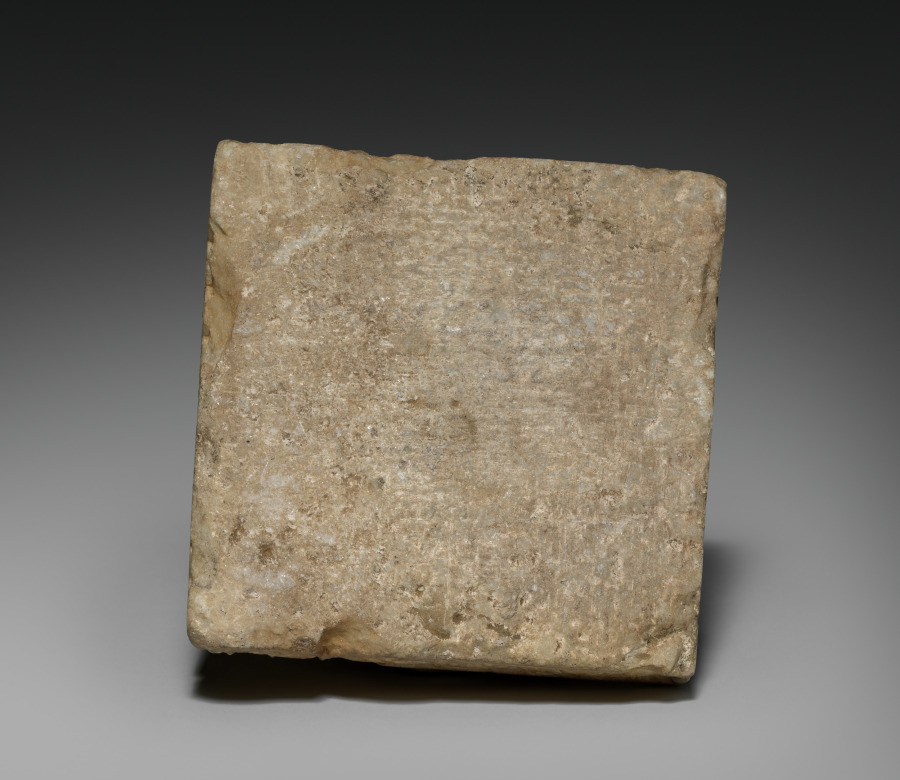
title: Column Base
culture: Spain, Cordoba, Spanish Umayyad period (756–1031)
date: c. 960–76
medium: Marble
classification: Sculpture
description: This base comes from the palatial city of Madinat al-Zahra near Cordoba (Spain) which was begun by caliph Abd al-Rahman III (r. 912–61) around 936. Large parts of the Iberian Peninsula were then under Islamic rule and experienced a cultural flowering. The city, destroyed already in 1010, was the most magnificent palace complex in Europe at the time.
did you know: In the mid-1800s the ruins of Madinat al-Zahra were rediscovered and the source of great fascination as people imagined a palace like that in the stories of 1001 Nights.